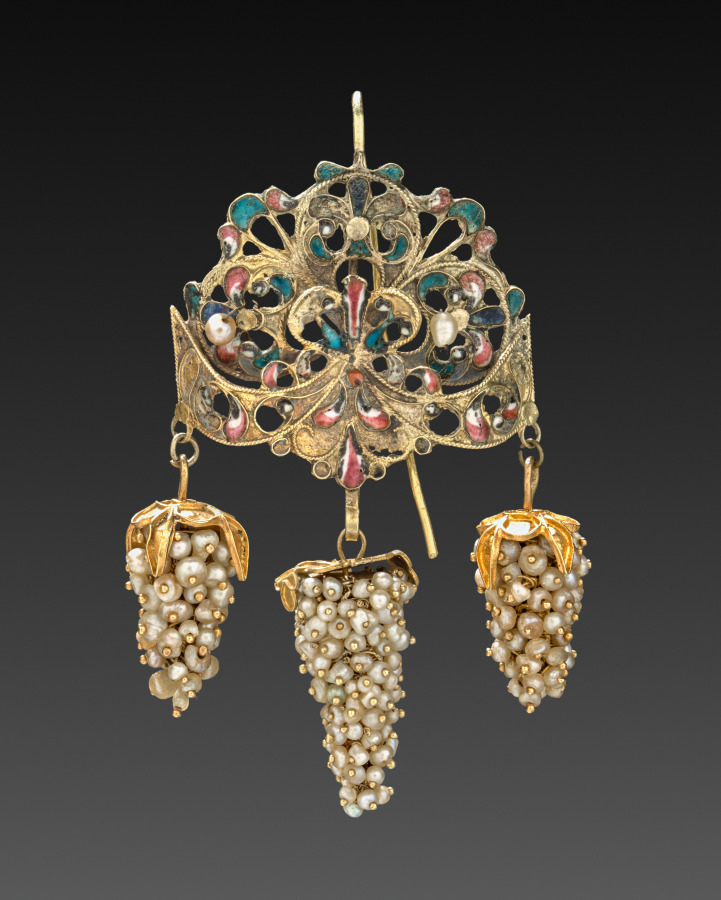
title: Earring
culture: Italy, Naples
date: 1700s–1800s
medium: gold and enamel with pearls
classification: Jewelry